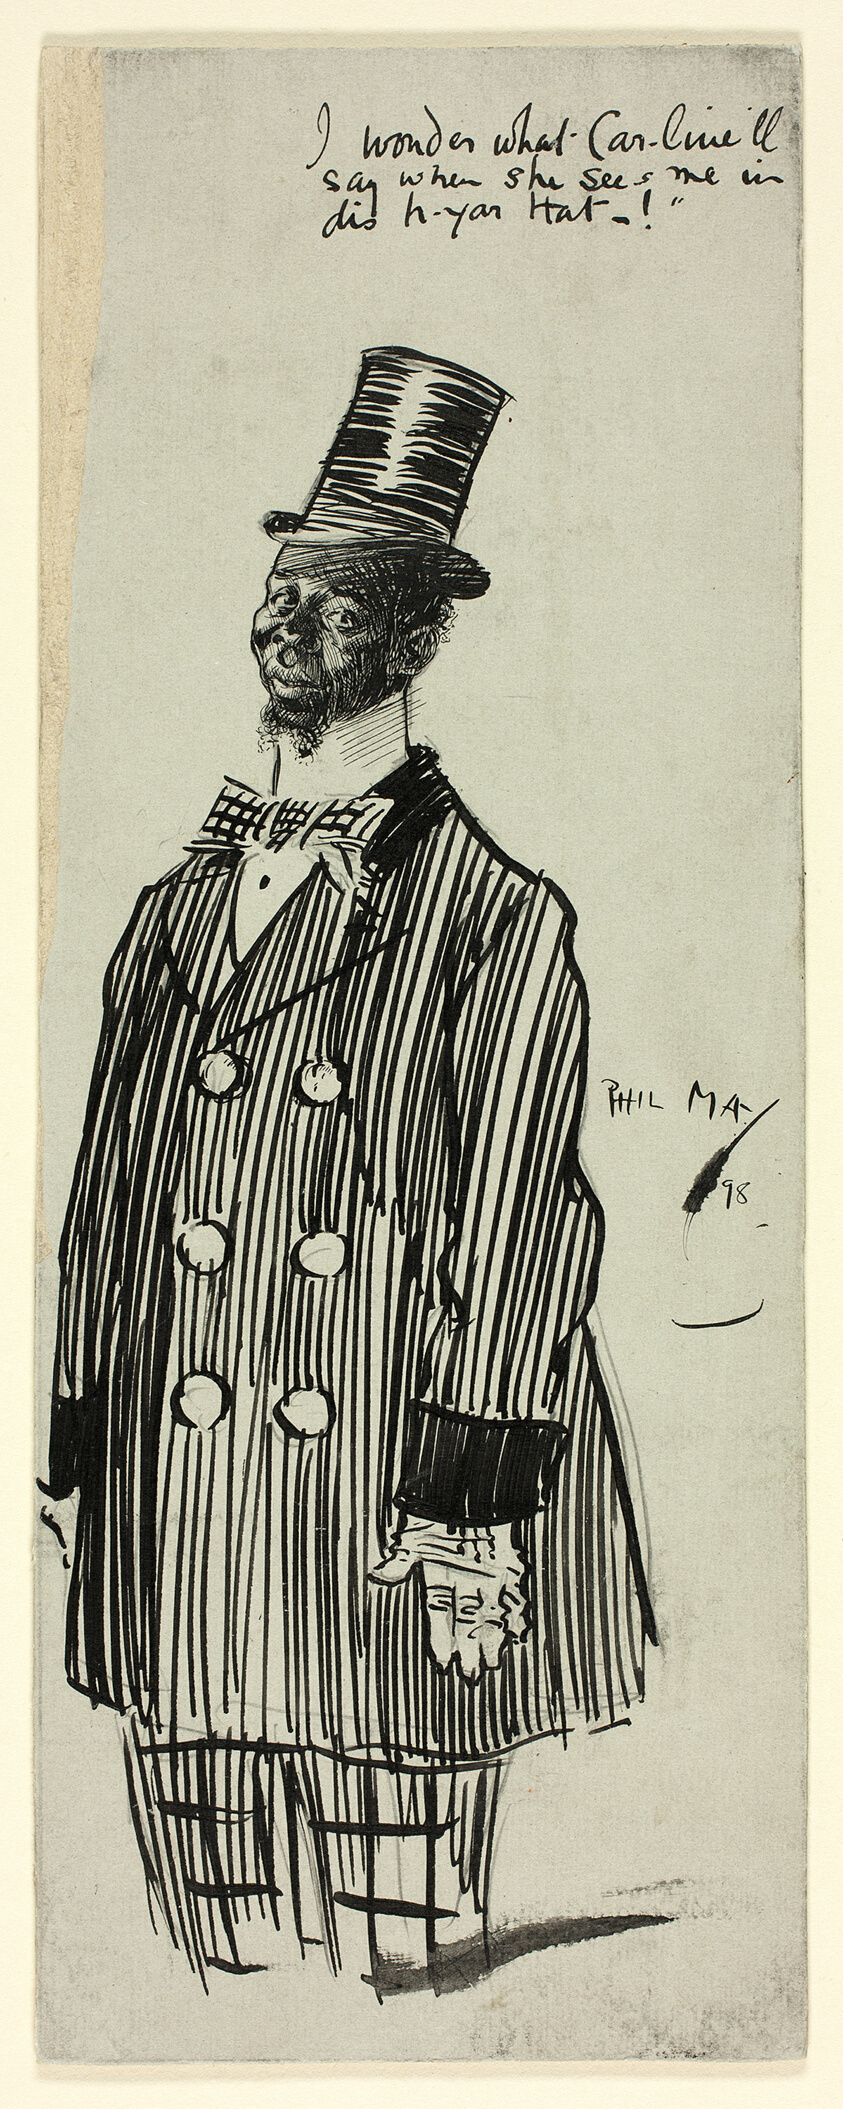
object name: Drawing and Watercolor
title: I Wonder What Caroline'll Say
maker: Philipp William May; English, 1864-1903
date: 1898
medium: Pen and black ink on gray board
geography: England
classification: pen and ink drawings; drawings (visual works); prints and drawing